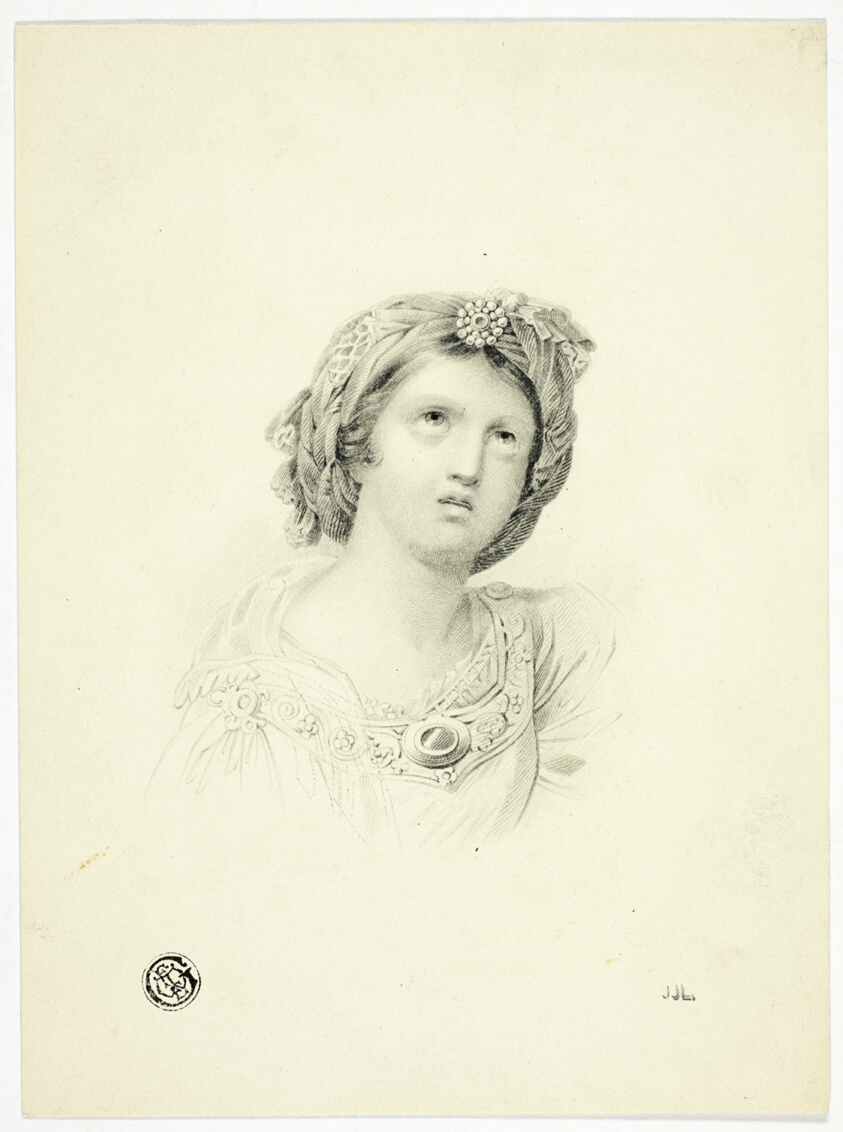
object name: Drawing and Watercolor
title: Sibyl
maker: Charles Heath (English, 1785-1848)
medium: Graphite, with traces of pen and black ink, on cream wove card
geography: England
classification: graphite; drawings (visual works); prints and drawing